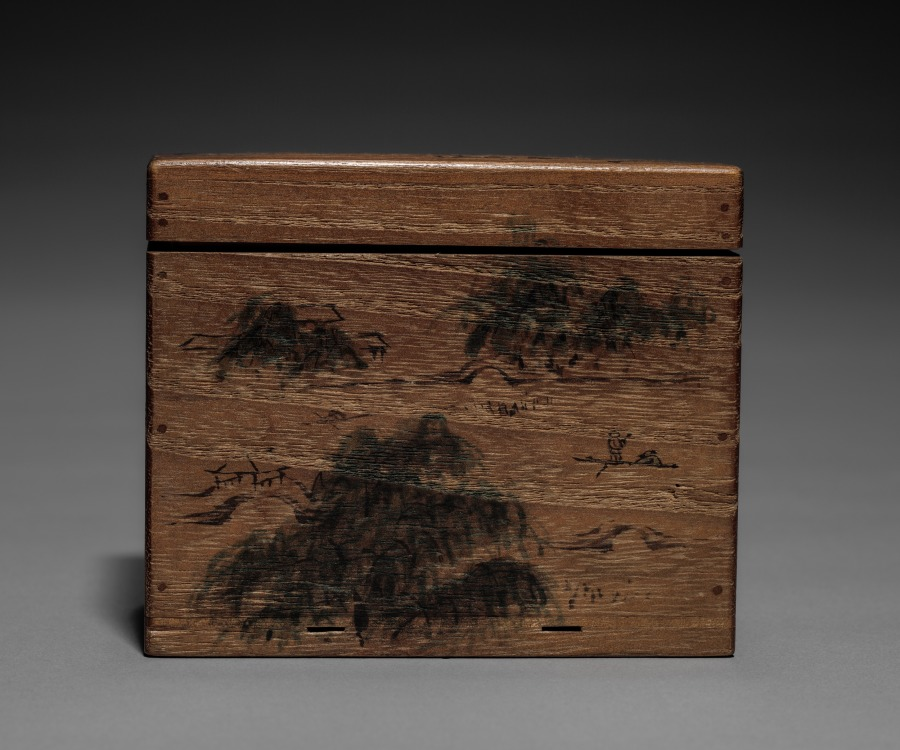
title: Pair of Tea Containers with Plum Blossoms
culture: Japan, Edo period (1615–1868)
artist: Aoki Mokubei (Japanese, 1767–1833)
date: early 1800s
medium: porcelain with underglaze blue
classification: Ceramic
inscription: signed "Ro Mokubei" on base in underglaze blue.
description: Aoki Mokubei, born into a family of restaurateurs, was a potter, calligrapher, painter, and scholar, and is considered one of the three masters of later Edo period Kyoto ceramics. He specialized in porcelains fashioned after Chinese prototypes, and created works for steeped tea (sencha) such as these matching tea caddies decorated in an underglaze blue called sometsuke—literally “with applied dye.” He signed them on their bottoms. They also have intricately patterned silk sleeves to both beautify and protect them. On the exterior of the lid of the outer wooden box that contains them, it is written that Mokubei inscribed and painted an image on the box. On the interior of the lid, the signature and seals of a former owner are written. Mokubei has signed the lid of the inner box, and a charming ink and light color composition of West Lake in Hangzhou in China covers its three sides. On the fourth side is a long inscription by Mokubei describing the scene.